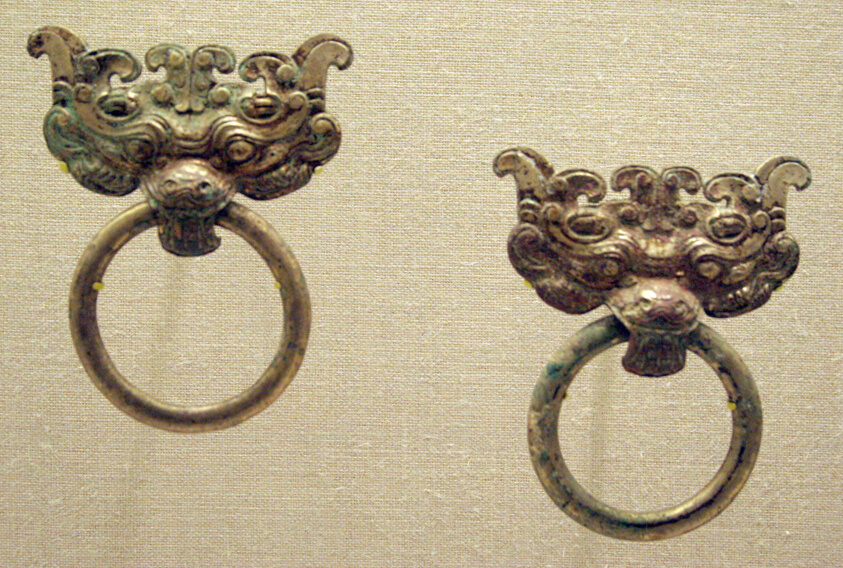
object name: Decorative Arts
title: Monster-Mask Fitting with Ring Handle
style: Chinese (culture or style)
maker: China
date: Han dynasty (206 B.C.–A.D. 220)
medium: Gilt bronze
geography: China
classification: bronze; metal; fitting; asian art; decorative arts